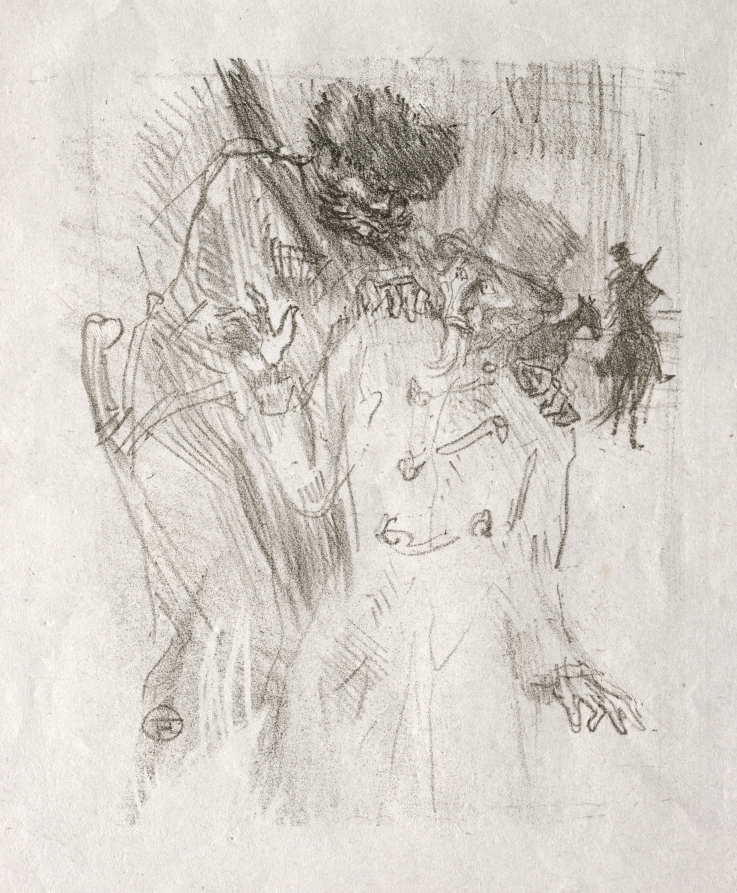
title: Au pied du Sinaï: Arrestation de Schlomé Fuss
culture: France, 19th century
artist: Henri de Toulouse-Lautrec (French, 1864–1901)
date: 1898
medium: lithograph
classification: Print